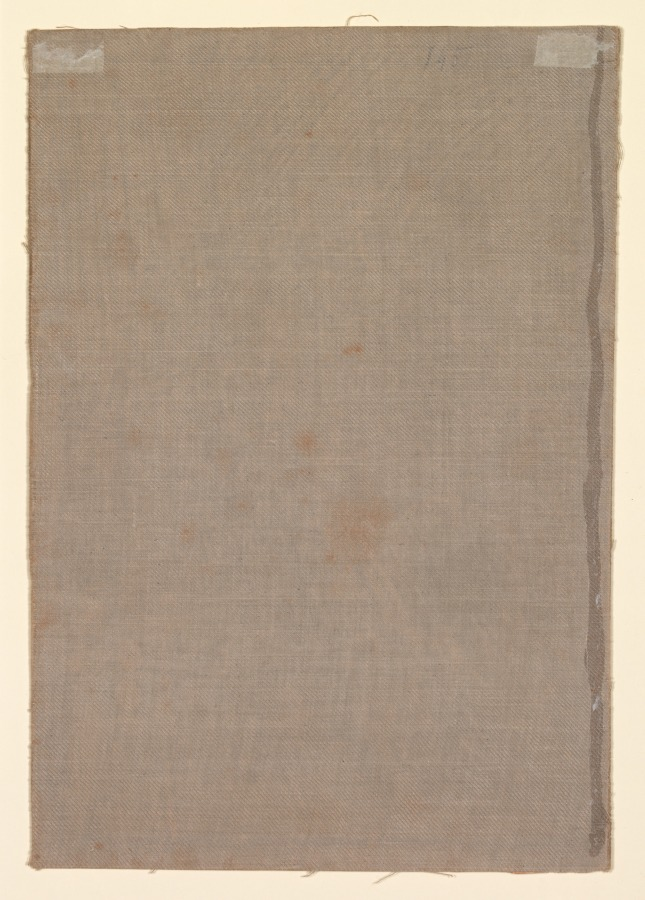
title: A pair of Brahminy ducks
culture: India, Mughal, 16th century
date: c. 1595; borders added probably 1800s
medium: Gum tempera on paper, mounted with later pink and blue borders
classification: Painting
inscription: Inscription above painting, Arabic numerals: 38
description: The Brahminy duck, also known as the ruddy shelduck, can be found throughout Southern Europe, North Africa, and Southeast Asia. This painting accurately depicts the orange coloring of Brahminy ducks and the patches of white on their wings. They are also recognizable by their long legs and short bills. The level of detail in realistic paintings of animals like this one suggests that Mughal artists studied live subjects, such as the waterfowl that lived in Mughal palace gardens.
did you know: Delicate dots articulate the texture of webbed feet and toothy row in the beak.